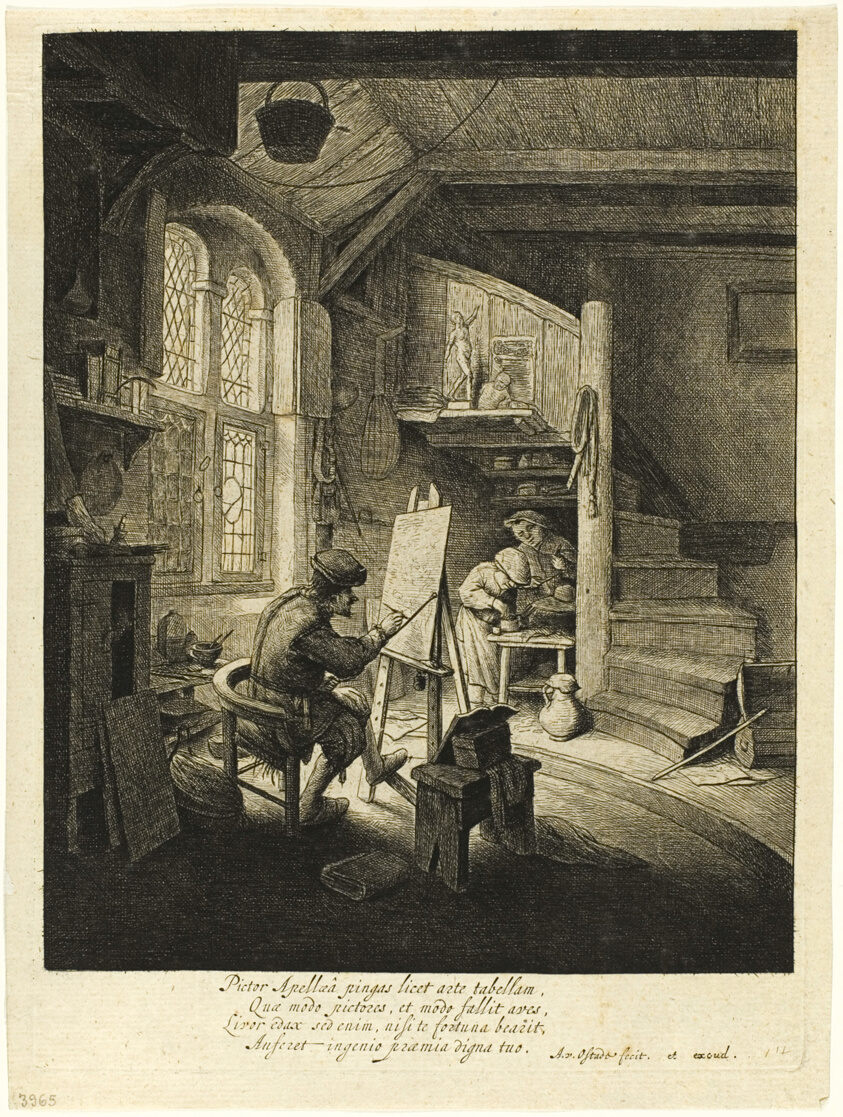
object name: Print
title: The Painter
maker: Adriaen van Ostade (Dutch, 1610-1685)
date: c. 1647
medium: Etching in black on buff laid paper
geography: Holland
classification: etching; print; prints and drawing